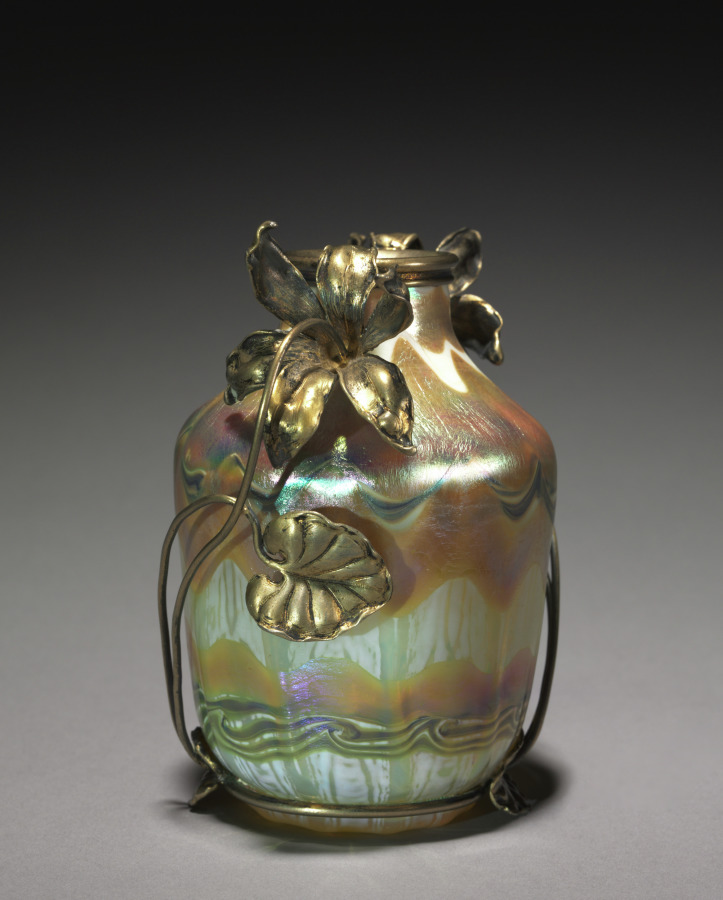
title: Vase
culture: America, New York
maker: Tiffany Glass & Decorating Company (America, New York, 1892–1902)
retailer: Siegfried Bing (German, active in France, 1838–1905)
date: c. 1900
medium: Favrile glass, silver mount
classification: Glass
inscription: Louis C. Tiffany o10301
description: This small vase is made of Louis Comfort Tiffany's signature Favrile glass. Early on when Tiffany began collaborating with glass artists on new types of production, his aesthetic ambitions were realized in the development of Favrile glass, deliberately named to sound French, expensive, and “handmade.” Largely through Tiffany's marketing ability, Favrile glass became America’s greatest contribution to the Art Nouveau style. His works were exhibited at international expositions; galleries in major European cities, where his creations were bought by many museums; and in his store in Manhattan, known as the Tiffany Glass and Decorating Co., later Tiffany Studios. Along with the many shapes and sizes of his decorative vases, Tiffany used Favrile glass in mosaic panels, stained glass windows, and his artistic line of table and floor lamps.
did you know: This vase has French mounts indicating that it was likely sold by Louis Comfort Tiffany's agent in Paris, Siegfried Bing, who helped popularize Tiffany's designs throughout Europe.